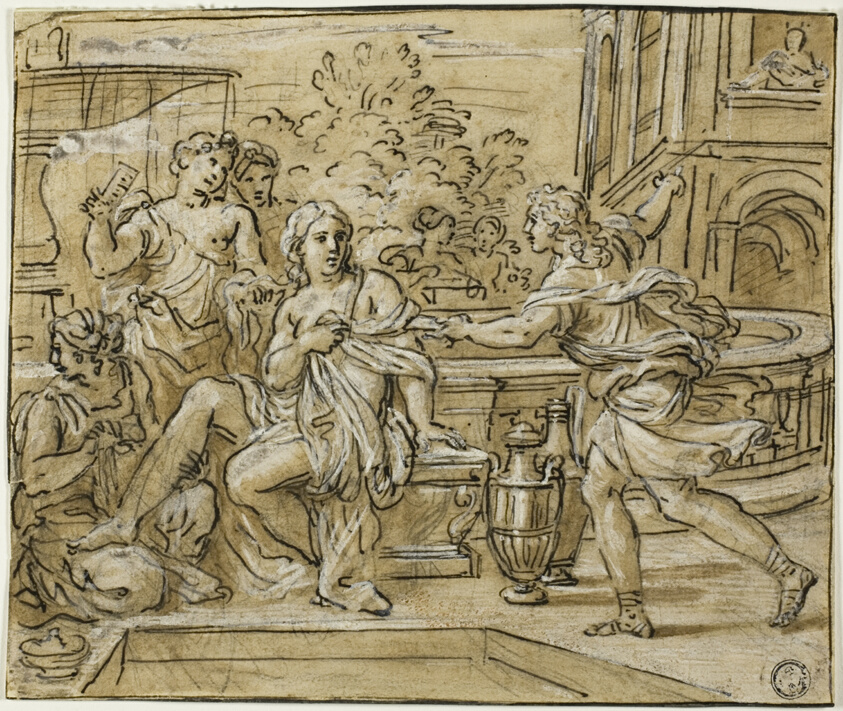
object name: Drawing and Watercolor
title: David and Bathsheba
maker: Possbily after Giuseppe Passeri; Italian, 1654-1714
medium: Pen and brown ink, with brush and brown wash, heightened with white gouache, over black chalk on cream laid paper, partially laid down on ivory laid paper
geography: Italy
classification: pen and ink drawings; drawings (visual works); prints and drawing